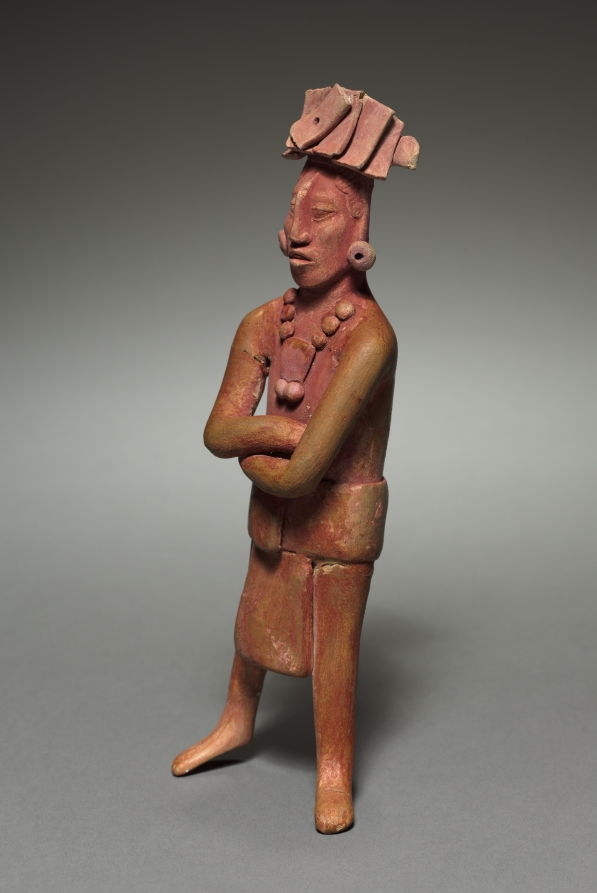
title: Figure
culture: Mexico, Jaina, Campeche, Maya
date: 317–987 CE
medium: terracotta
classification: Ceramic